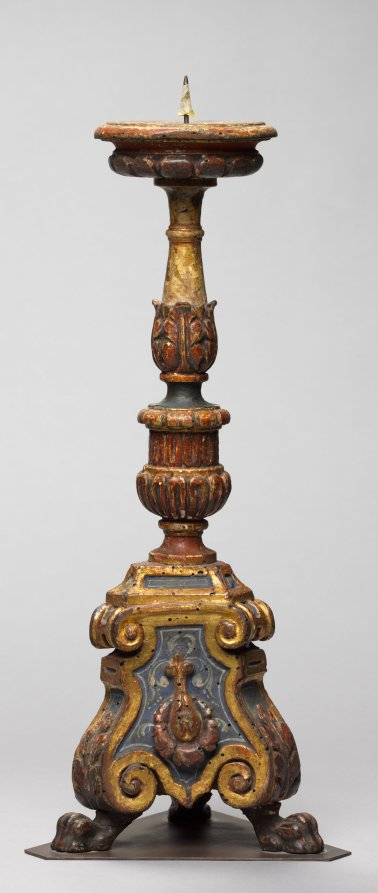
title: Candlestick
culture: Italy, probably Tuscany, late 15th century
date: late 1400s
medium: carved and gilded wood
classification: Furniture and woodwork